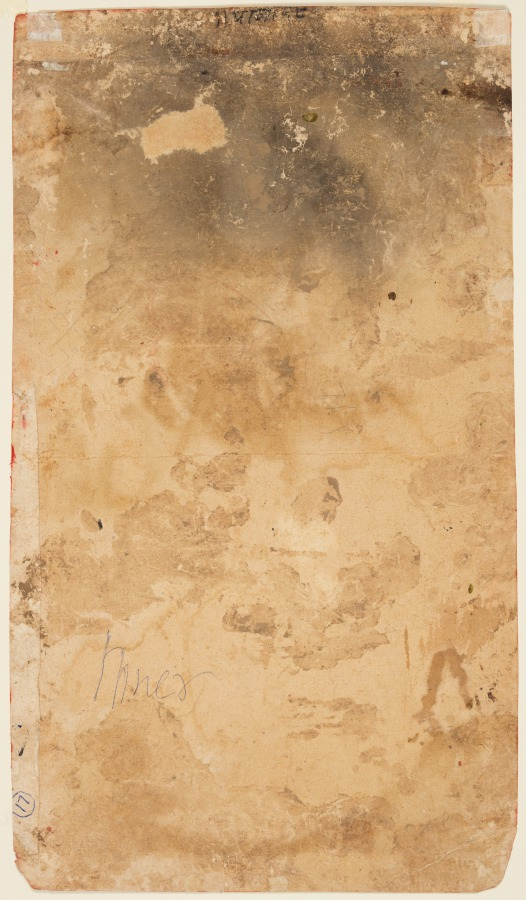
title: Krishna Quells the Serpent Kaliya, from a Bhagavata Purana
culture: Northwestern India, Rajasthan, Rajput Kingdom of Mewar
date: c. 1710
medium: gum tempera and gold on paper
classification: Painting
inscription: pānā 29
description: In the forest where Krishna lived as a youth among the cowherds, there was a great pool of water connected to the Yamuna River. The water had become toxic from the poison excreted by all the snakes living there, including the serpent Kaliya. Kaliya’s royal residence is depicted at the lower right. In order to make the pool usable for drinking and bathing, Krishna tamed the serpent king by dancing on his heads. Krishna then persuaded him to move away to the ocean.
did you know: The snake-demon Kaliya holds a flower in his mouth for Krishna.